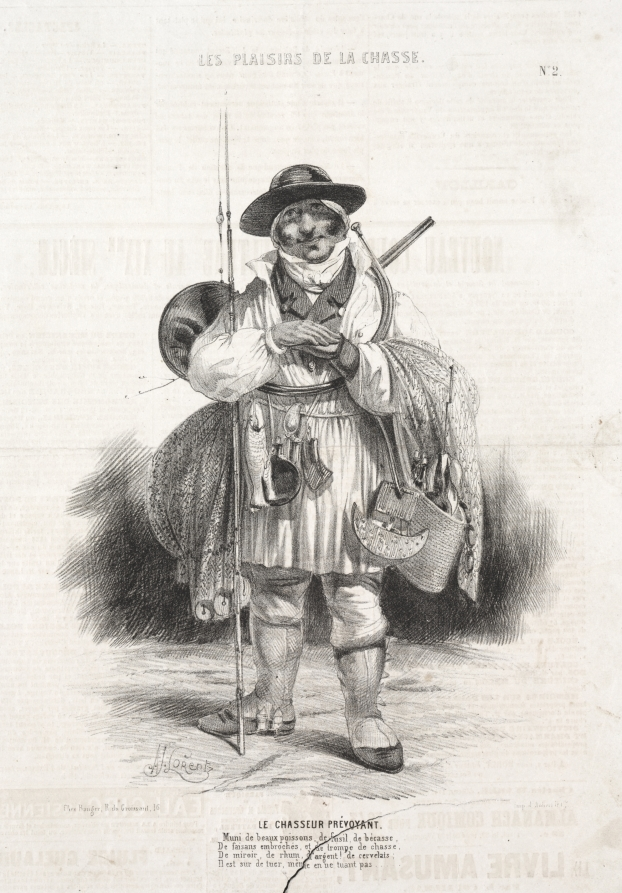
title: Les Plaisirs de la chasse: Le Chasseur prévoyant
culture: France, 19th century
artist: Alade Joseph Lorentz (French, 1813-after 1858)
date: 1842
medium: lithograph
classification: Print